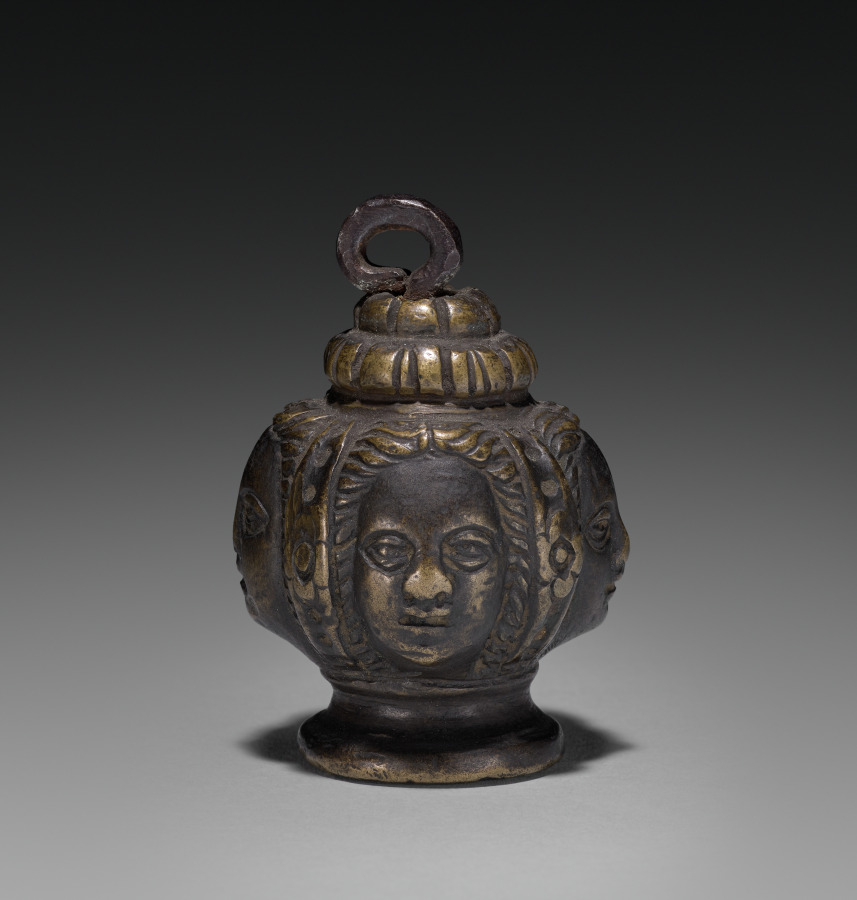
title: Decorative Finial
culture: Italian or French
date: 1800s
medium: brass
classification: Arms and Armor